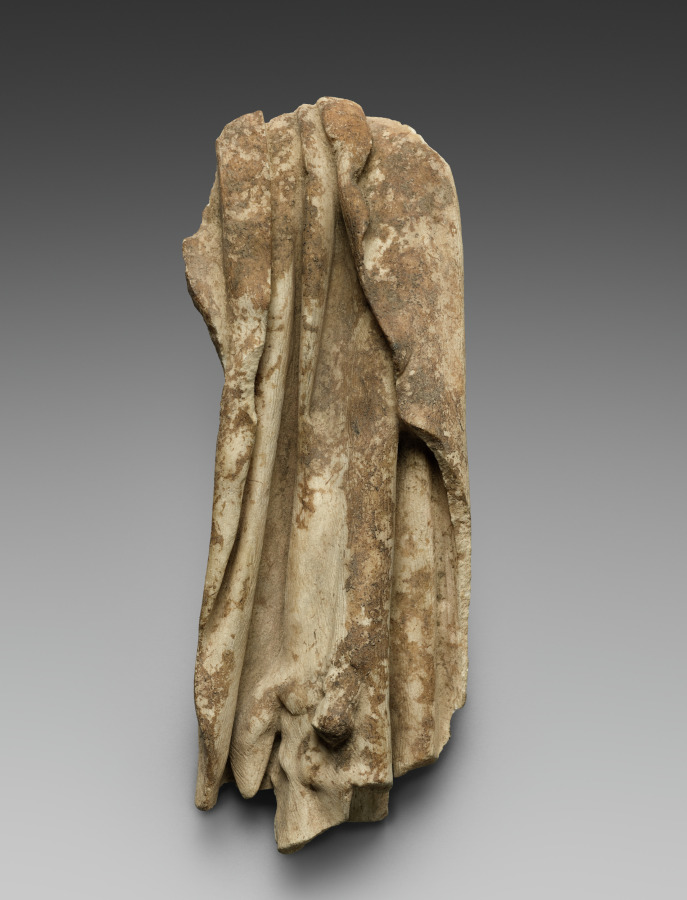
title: Torso of Apollo: Fragment of Goat Skin Drapery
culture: Italy, Roman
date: c. 100–200 CE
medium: marble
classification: Sculpture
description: This fragment is part of an ancient statue that depicts the mythical god Apollo.